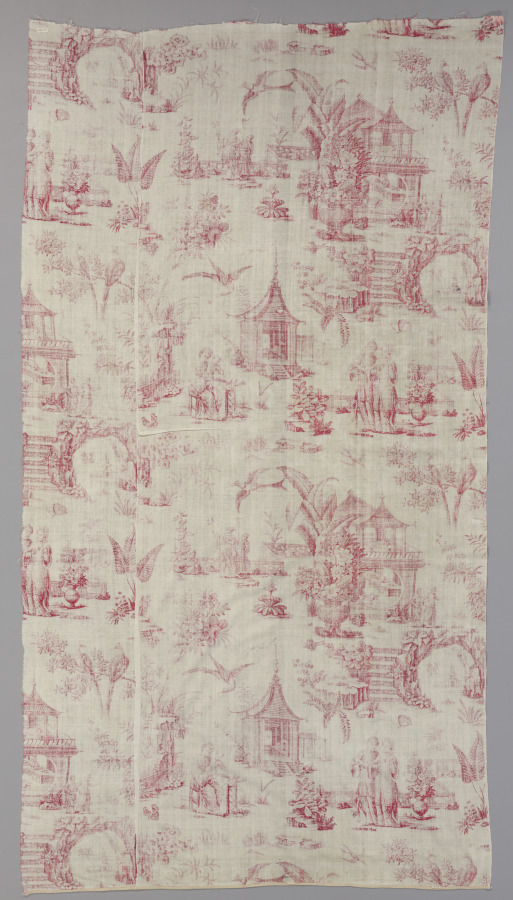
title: Copperplate-Printed Cotton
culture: England, Chambers, 18th century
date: 1700s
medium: copperplate printed cotton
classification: Textile